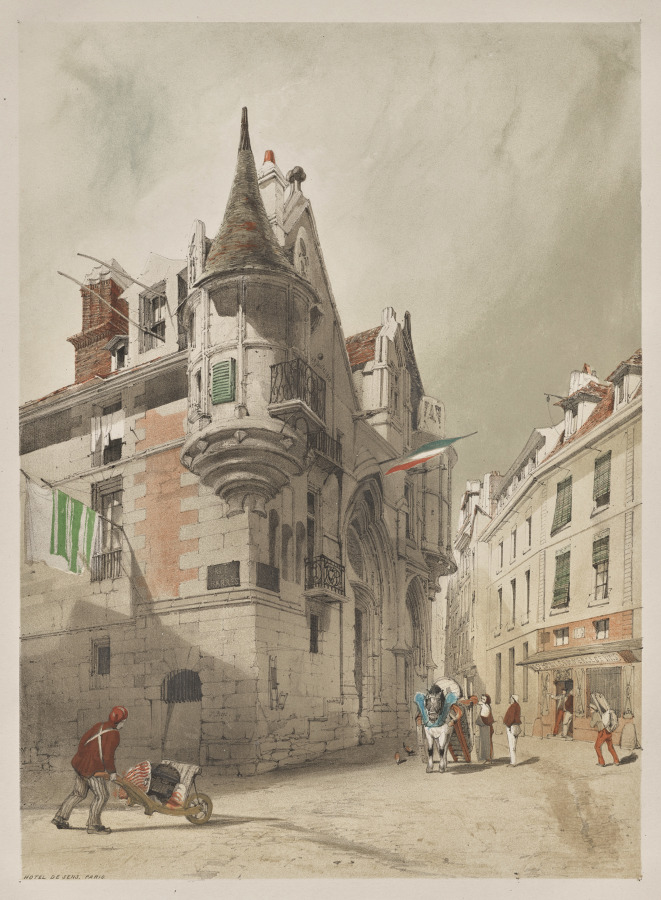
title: Picturesque Architecture in Paris, Ghent, Antwerp, Rouen: Hôtel de Sens, Paris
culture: England, 19th century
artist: Thomas Shotter Boys (British, 1803–1874)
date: 1839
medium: lithograph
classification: Portfolio